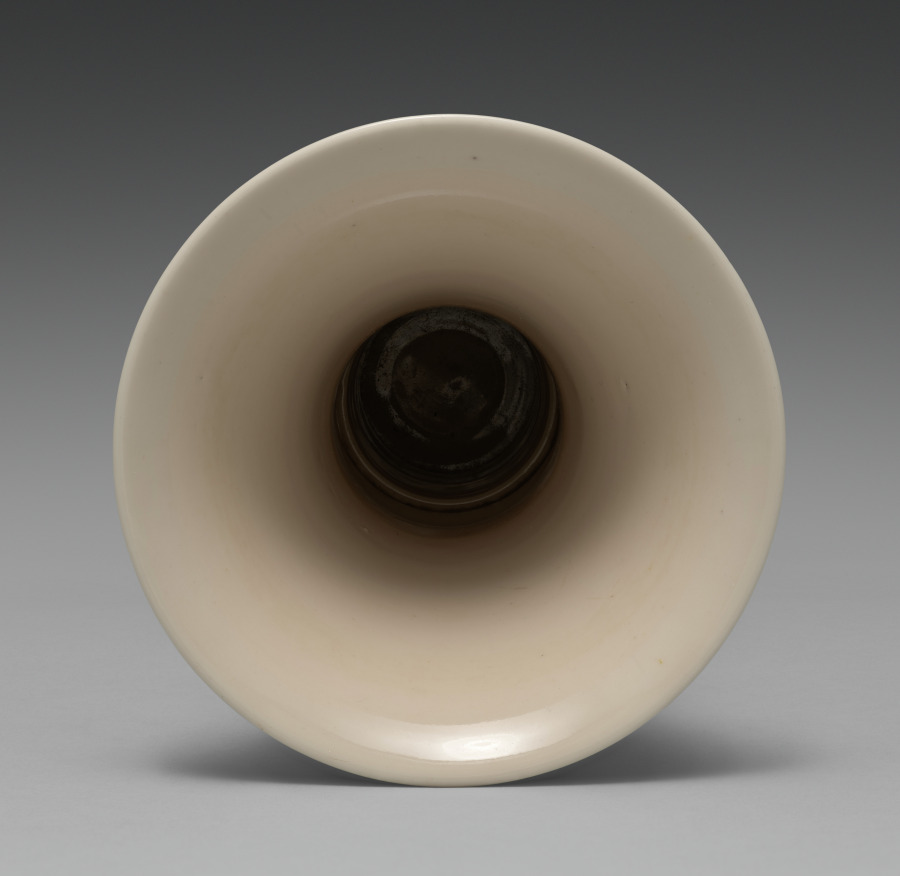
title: Gu-Shaped Flower Vase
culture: Japan, Meiji period (1868–1912)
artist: Seifū Yohei III (Japanese, 1851–1914)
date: 1893–97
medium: Glazed porcelain with molded and carved designs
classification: Ceramic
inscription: 大日本清風造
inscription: This gu-shaped vase has “cherry blossom glaze” (ōkayū), according to the inscription on its box.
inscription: A label affixed to the side of the box gives a sense of how previous owners conceived of the piece. Although the label is partially abraded, one can make out the character nezu 鼠, used in the names of numerous light pinks, from Naniwa pink (Osaka pink) to Miyako pink (Kyoto, or capital, pink). Also legible is the phrase hakugōrai, a broad term that can describe a shade of white associated with ceramics discovered in Korean tombs, but often applied to other ceramics of similar coloration, many from Chinese kilns, including Ding (J. Tei) ware of the Northern Song dynasty.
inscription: 清風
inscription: 帝室技芸員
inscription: 清風與平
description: Seifū Yohei III was the most prominent head of a ceramics studio in Kyoto that specialized in Chinese-style porcelains and especially items for use in sencha (煎茶), or the drinking of steeped-leaf tea with companions. Sencha was popular among the bunjin of Kyoto and Osaka, who often enjoyed it as part of their emulation of Chinese culture. While sencha was by design less formal than the Japanese tea ceremony, it still featured the display of treasured objects. Prized Chinese antiquities were generally unobtainable, so substitutes such as the Gu-Shaped Flower Vase were much in demand.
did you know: This gu-shaped vase has “cherry blossom glaze” (ōkayū), which Yohei III invented in 1890.